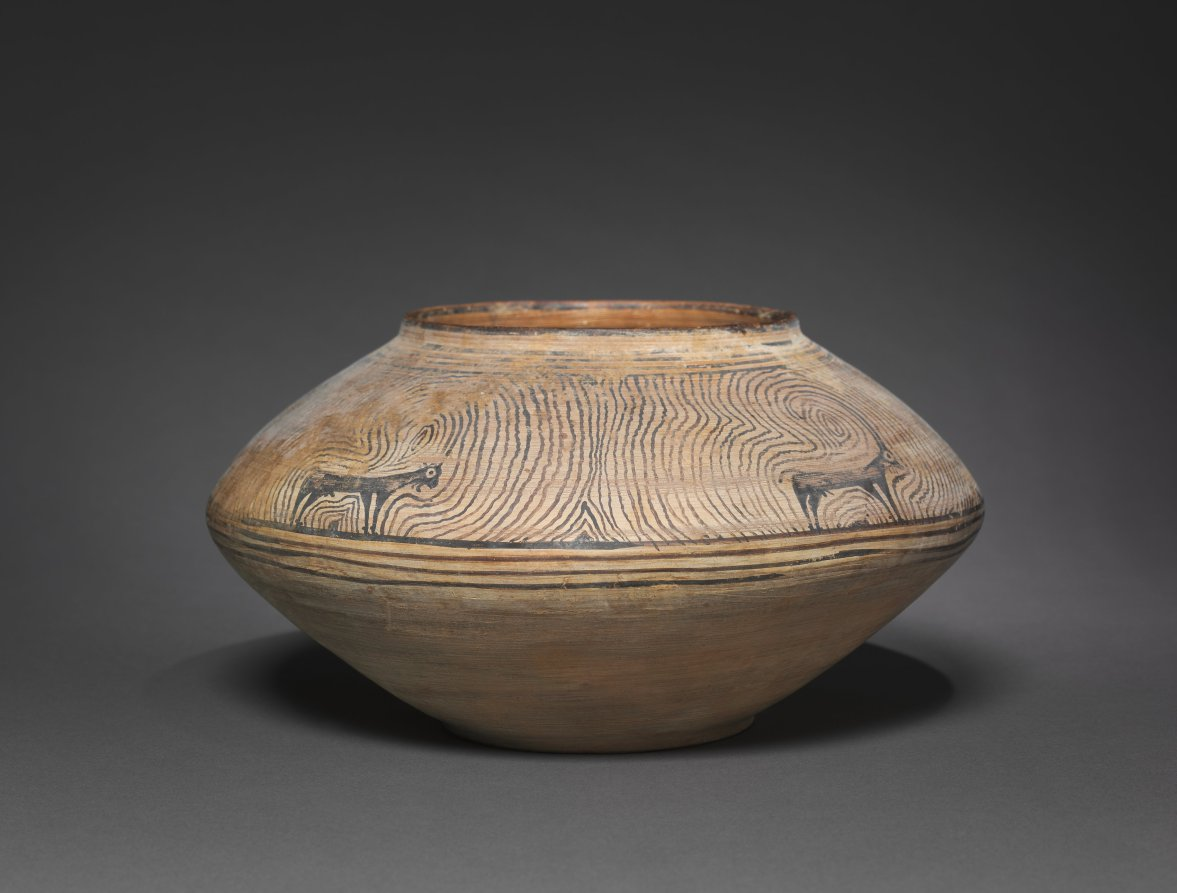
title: Jar with Four Ibex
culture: Pakistan, probably Quetta, Indus Valley Civilization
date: c. 2800–2500 BCE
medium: ceramic with black slip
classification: Ceramic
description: Large numbers of ceramic vessels decorated with black slip have been found among the sophisticated urban settlements of South Asia's protohistoric Indus Valley civilization. The walls of this jar are so thin that it must have been created on a potter's wheel.The four male ibex have two curving horns of exaggerated length, and three hairs under the chin.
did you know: The long-horned ibex is at home in the Himalaya mountains, the source of the Indus River.